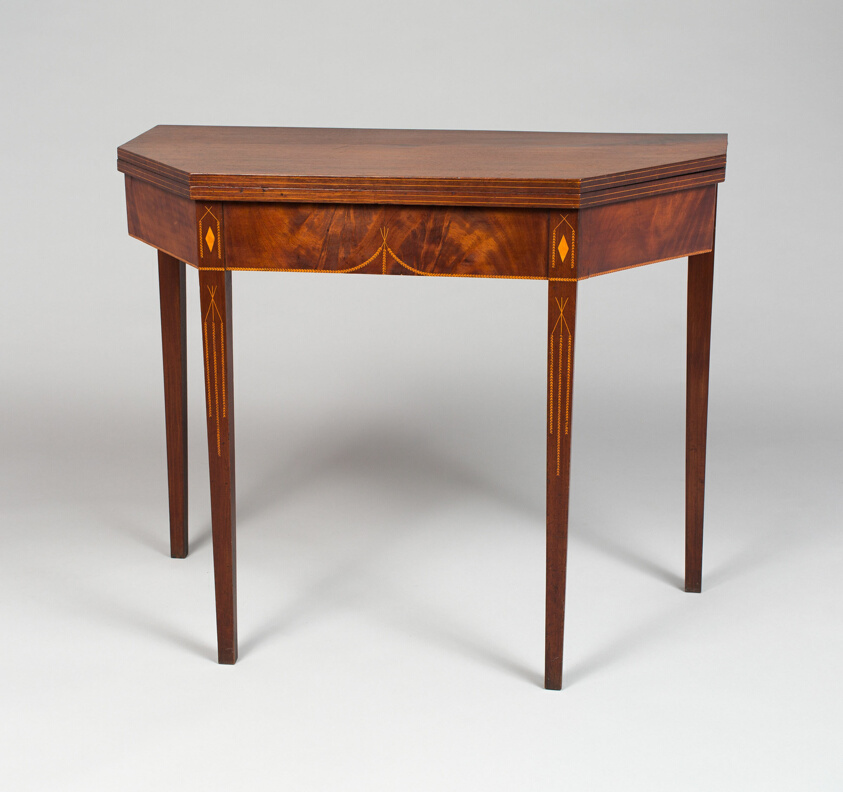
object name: Furniture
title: Card Table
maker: Artist unknown (American, 18th century); Newport, Rhode Island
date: c. 1790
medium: Mahogany and white pine with fruit wood inlay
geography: Newport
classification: table; furniture; american decorative arts; american arts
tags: furniture